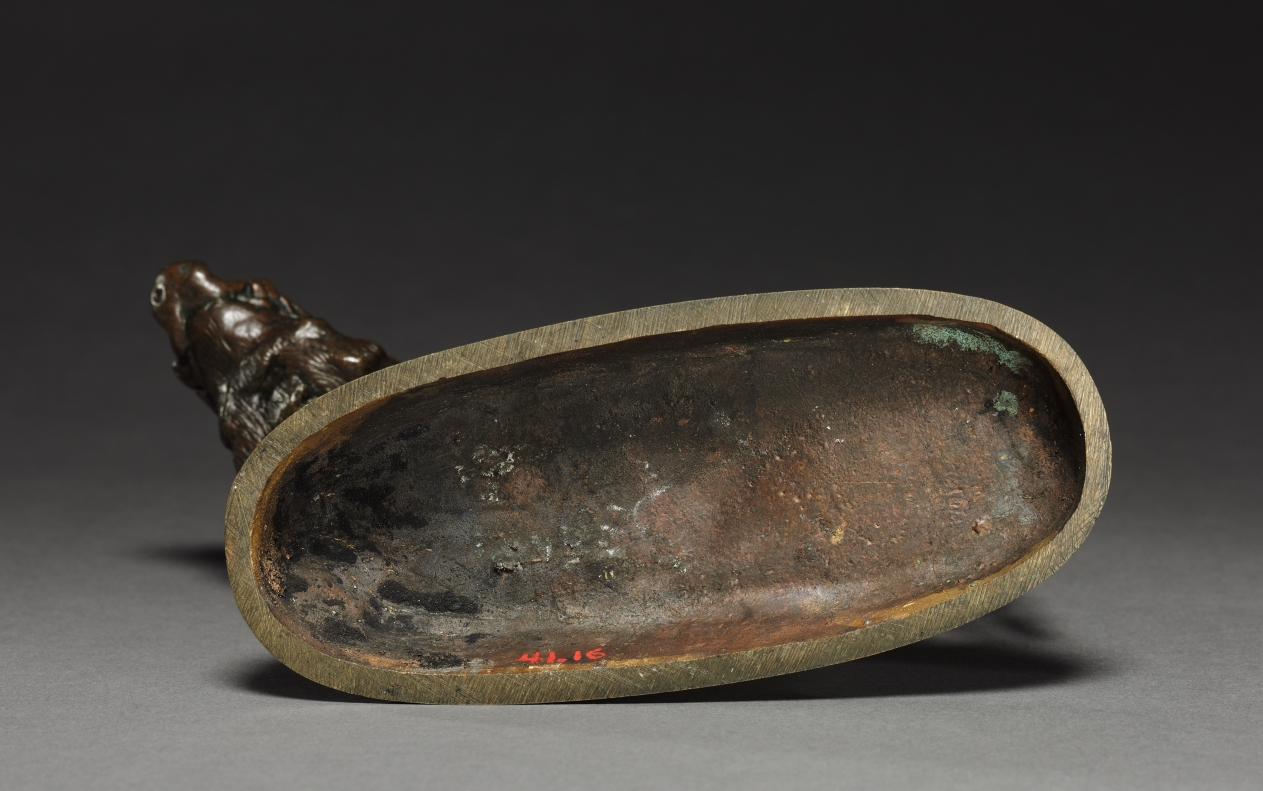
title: Wild Boar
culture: France, 19th century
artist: probably by Antoine-Louis Barye (French, 1796–1875)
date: 19th century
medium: bronze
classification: Sculpture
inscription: Signed" "Barye ALF" (...Foundry(?). On back of base: "C 808", in small letters